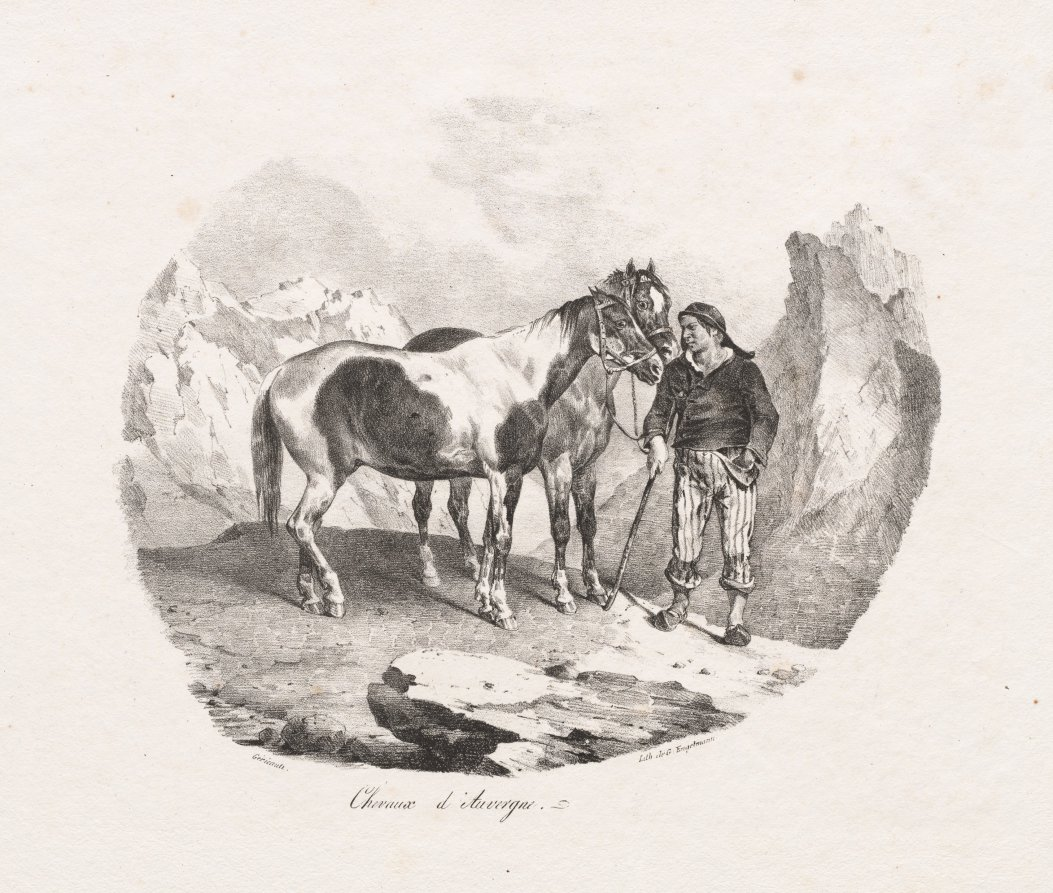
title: Chevaux d' Auvergne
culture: France, 19th century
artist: Théodore Géricault (French, 1791–1824)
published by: Gihaut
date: 1822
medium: lithograph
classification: Print